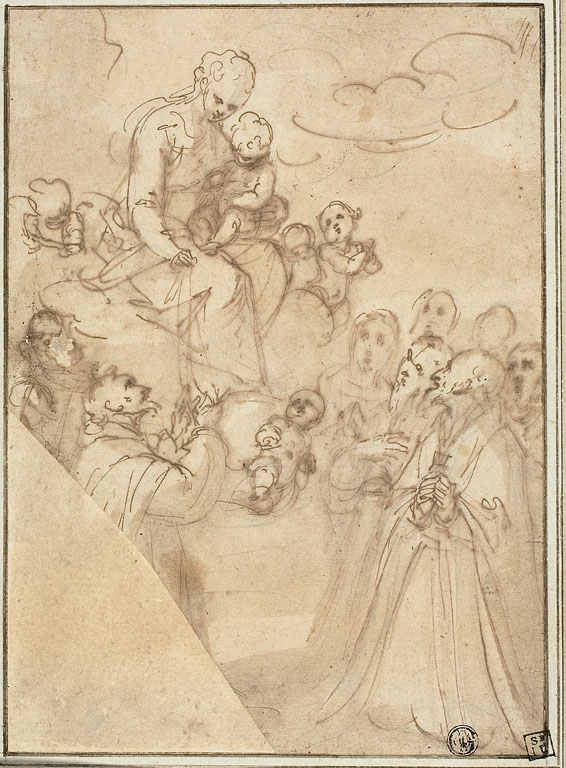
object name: Drawing and Watercolor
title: Madonna of the Rosary, with Dominic and Other Saints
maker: Guglielmo Caccia, called Il Moncalvo; Italian, 1568-1625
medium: Pen and brown ink, with brush and brown wash and graphite, on ivory laid paper, laid down on ivory laid card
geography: Italy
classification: pen and ink drawings; drawings (visual works); prints and drawing